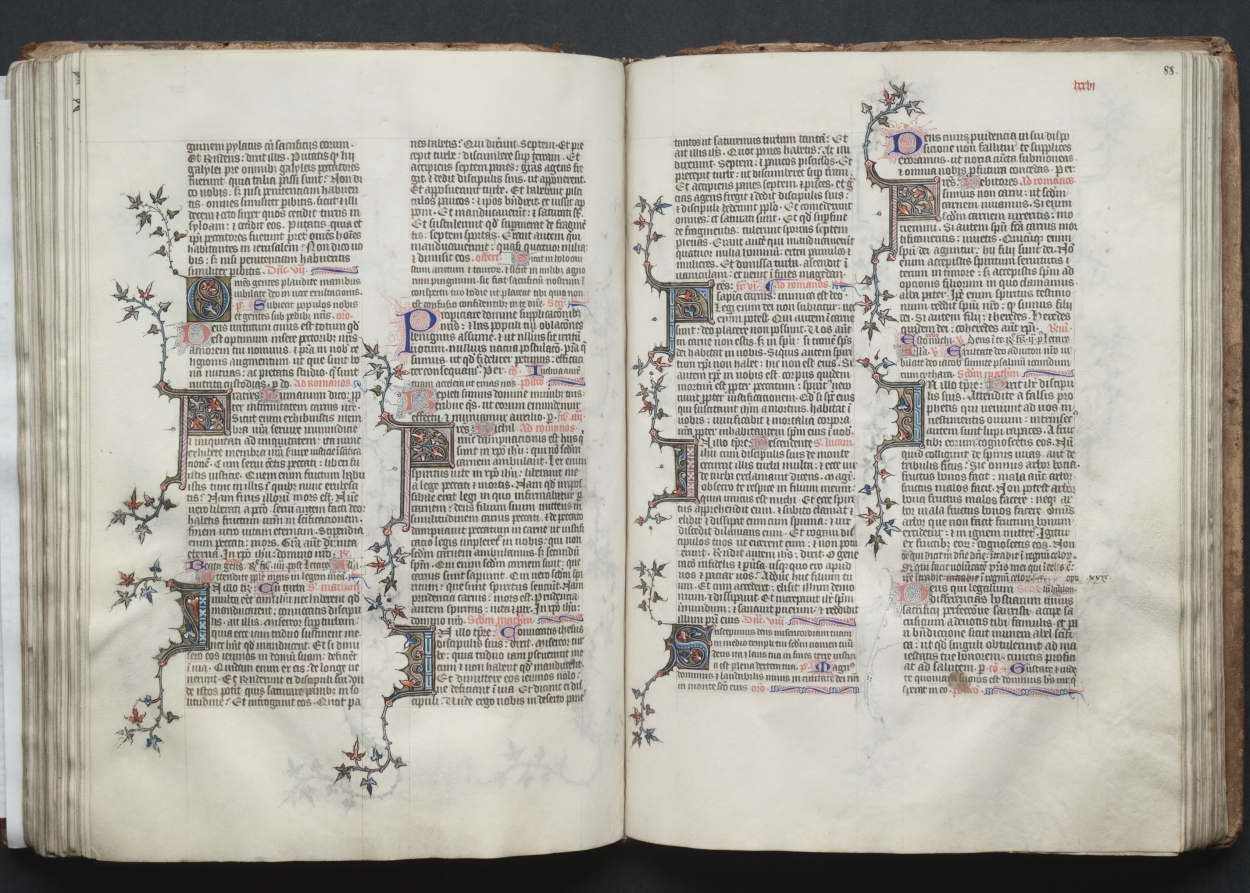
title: The Gotha Missal: Fol. 87v, Text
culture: France, Paris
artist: Master of the Boqueteaux (French)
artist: and Workshop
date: c. 1375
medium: ink, tempera, and gold on vellum; blind-tooled leather binding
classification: Bound Volume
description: The style and quality of this manuscript's decoration is typical of deluxe Parisian books made for aristocratic or royal patrons. Most of the book's decoration appears to be the work of the Master of the Boqueteaux, an artist active at the court of King Charles V (died 1380). His style was apparently shared by a number of book illuminators working in and around Paris. It is very possible that the Gotha Missal belonged to Charles V, but is not provable because the manuscript has no royal portraits and lacks a colophon. Given the book's magnificent decoration, however, it would seem that it was produced for a Valois prince, if not for the king himself. The manuscript receives its name from the German dukes of Gotha, its later owners.